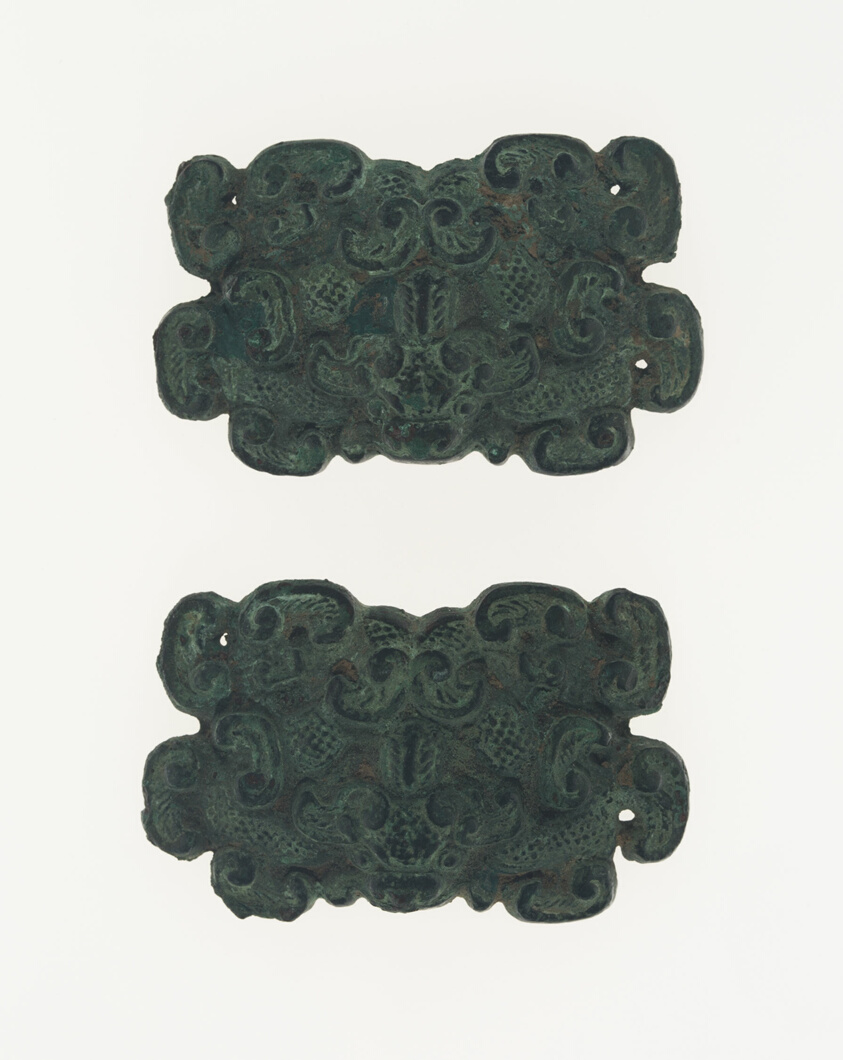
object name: Decorative Arts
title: Pair of Ornaments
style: Chinese (culture or style)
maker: China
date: Eastern Zhou dynasty, Warring States period (480–221 B.C.), c. 4th/3rd century B.C.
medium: Bronze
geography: China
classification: metal; metalwork; asian art; decorative arts